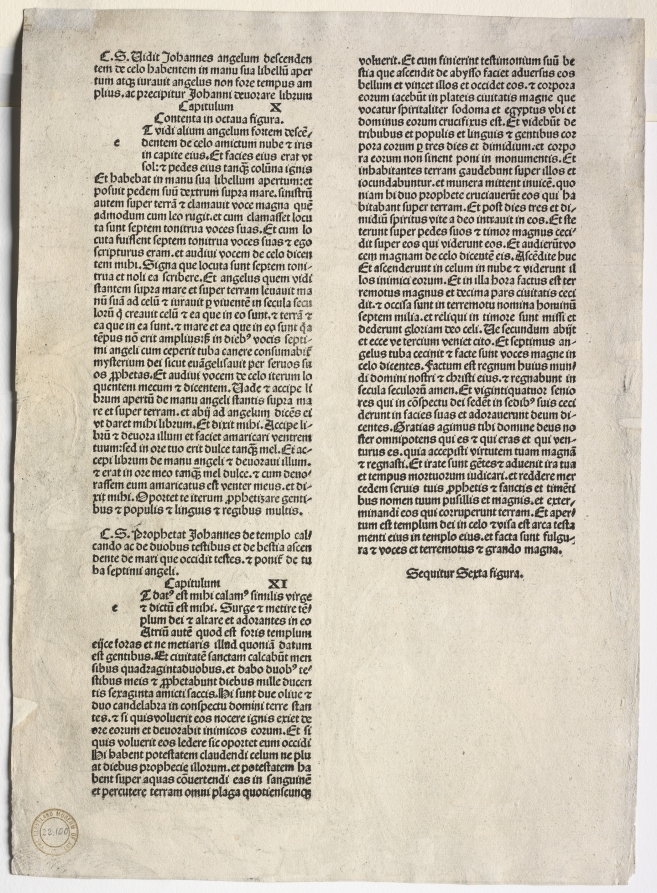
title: Revelation of St. John: Four Angels Holding up the Winds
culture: Germany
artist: Albrecht Dürer (German, 1471–1528)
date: 1511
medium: woodcut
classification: Print